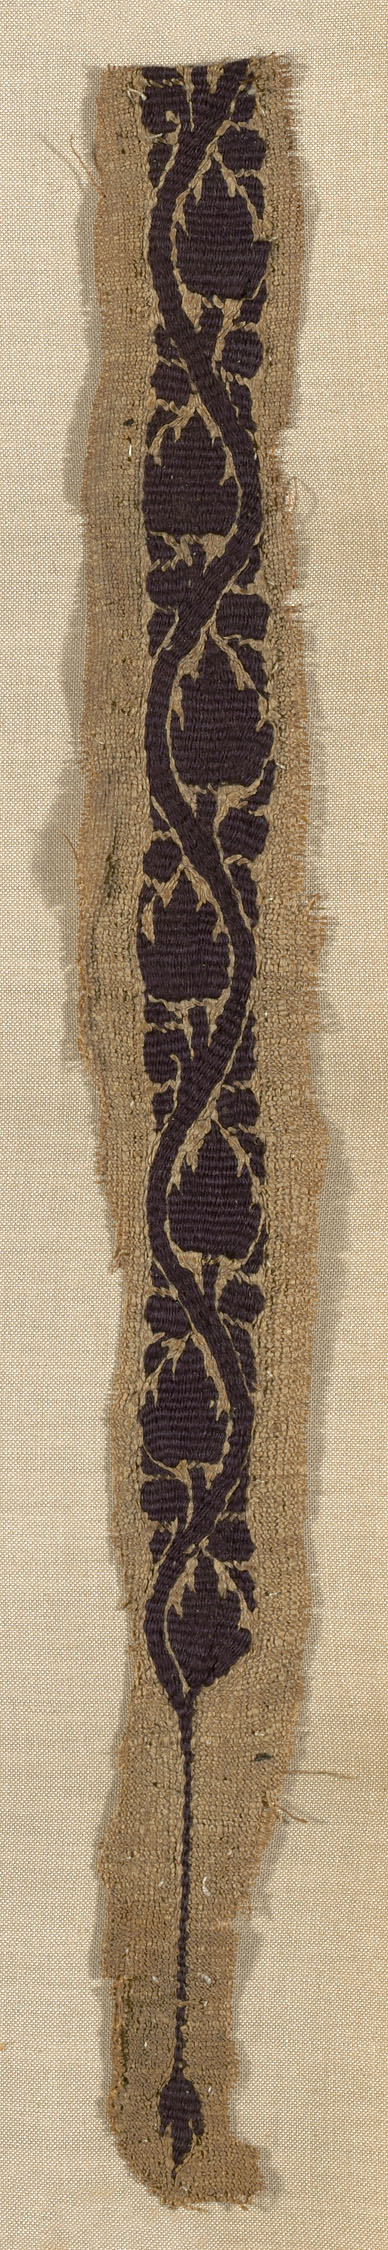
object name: Textile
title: Fragment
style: greco-roman (egyptian)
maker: Coptic (Egypt, Akhmin)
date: Greco–Roman period (30 B.C.–641 A.D.), 4th/5th century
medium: Linen and wool, slit tapestry weave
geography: Egypt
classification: textile; weaving